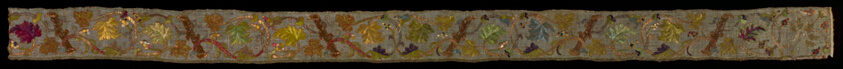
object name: Textile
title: Border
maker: England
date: c. 1580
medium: Linen, plain weave; embroidered with silk, silvered-metal-wire-wrapped silk, and gilt-and-silvered-metal-strip-wrapped silk in double running, leaf, satin, and stem stitches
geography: England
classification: textile; needlework (visual works)